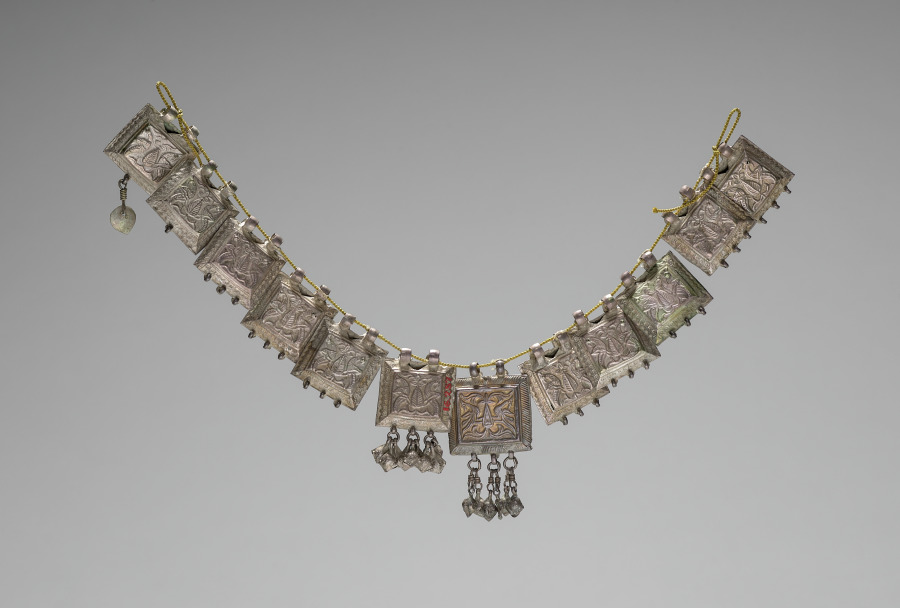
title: Necklace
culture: India, Punjab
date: 1800s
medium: silver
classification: Jewelry